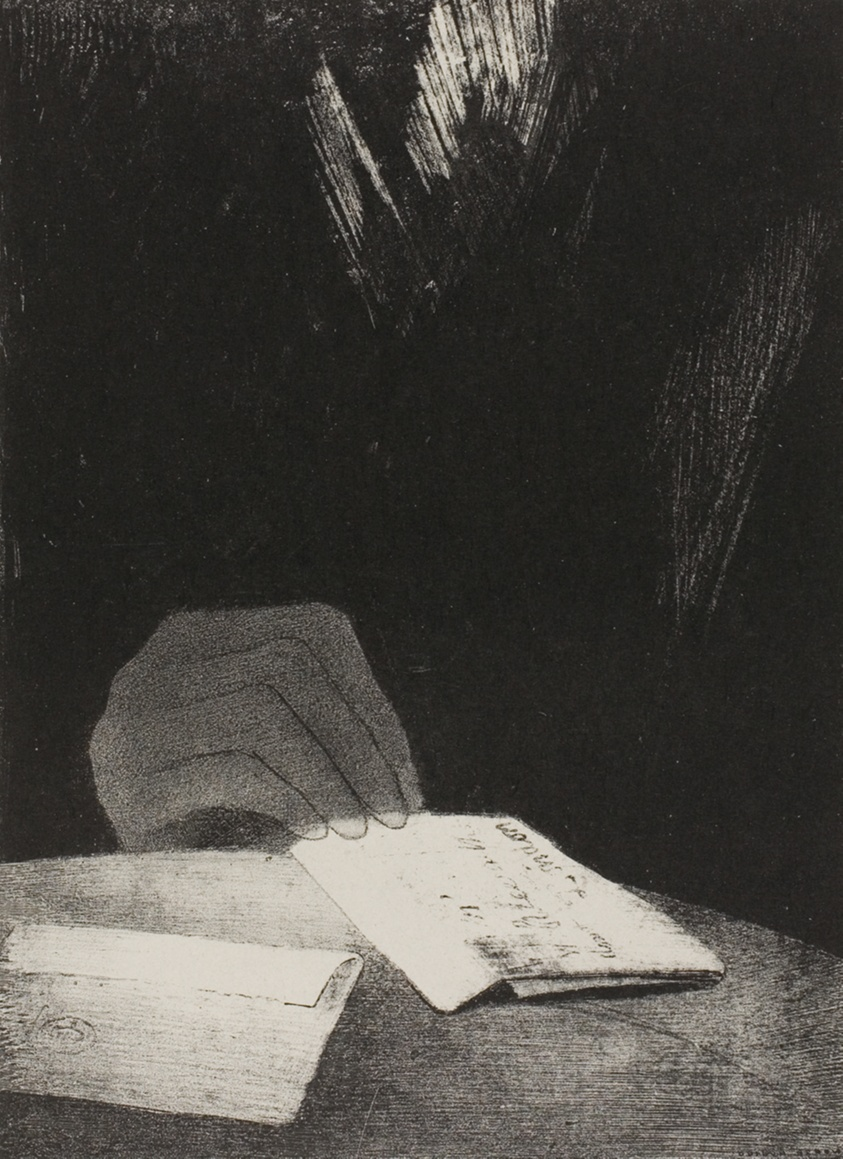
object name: Print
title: It Was a Hand, Seemingly as Much of Flesh and Blood as My Own, plate 4 of 6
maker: Odilon Redon (French, 1840-1916)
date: 1896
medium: Lithograph in black on ivory China paper laid down on white wove paper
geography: France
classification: lithograph; print; prints and drawing; paper